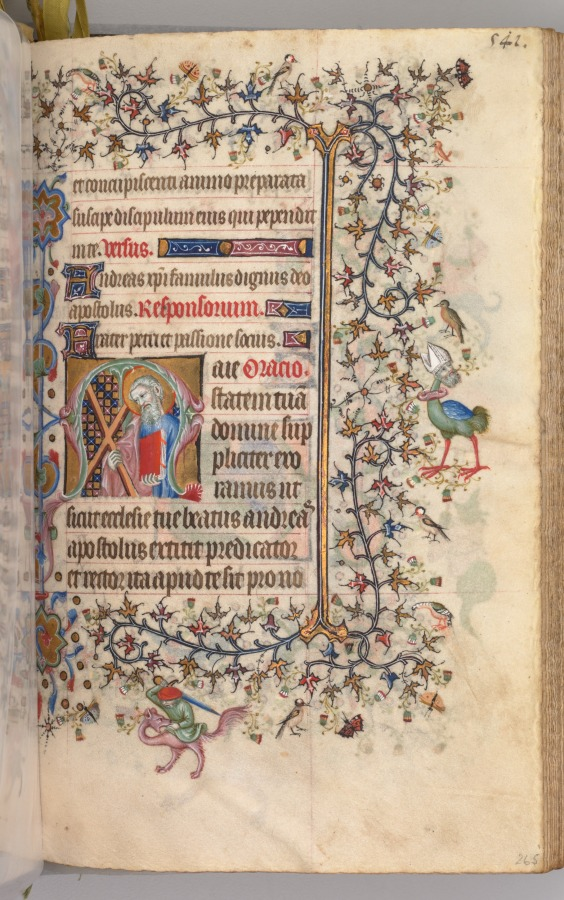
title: Hours of Charles the Noble, King of Navarre (1361-1425): fol. 265r, St. Andrew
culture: France, Paris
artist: Master of the Brussels Initials and Associates (French)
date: c. 1405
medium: ink, tempera, and gold on vellum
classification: Bound Volume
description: This precious volume was obviously highly prized by its owner, the French-born King of Navarre, who had his coat of arms painted on no less than twenty folios. Rather than directly commissioning this manuscript from a specific workshop, it seems that Charles the Noble acquired his book of hours -- perhaps ready-made for the luxury market -- while on a trip to Paris in 1404-05. A collaborative effort, six painting styles are evidenced within the pages of this codex, those of two Italians, two Frenchmen, and two Netherlanders. The painter who was responsible for the planning and decoration of the book, and who produced seventeen of the large miniatures, was a Bolognese artist known as the Master of the Brussels Initials. His principal assistant, responsible for most of the borders, was a Florentine who signed his name "Zecho" da Firenze on folio 208 verso.